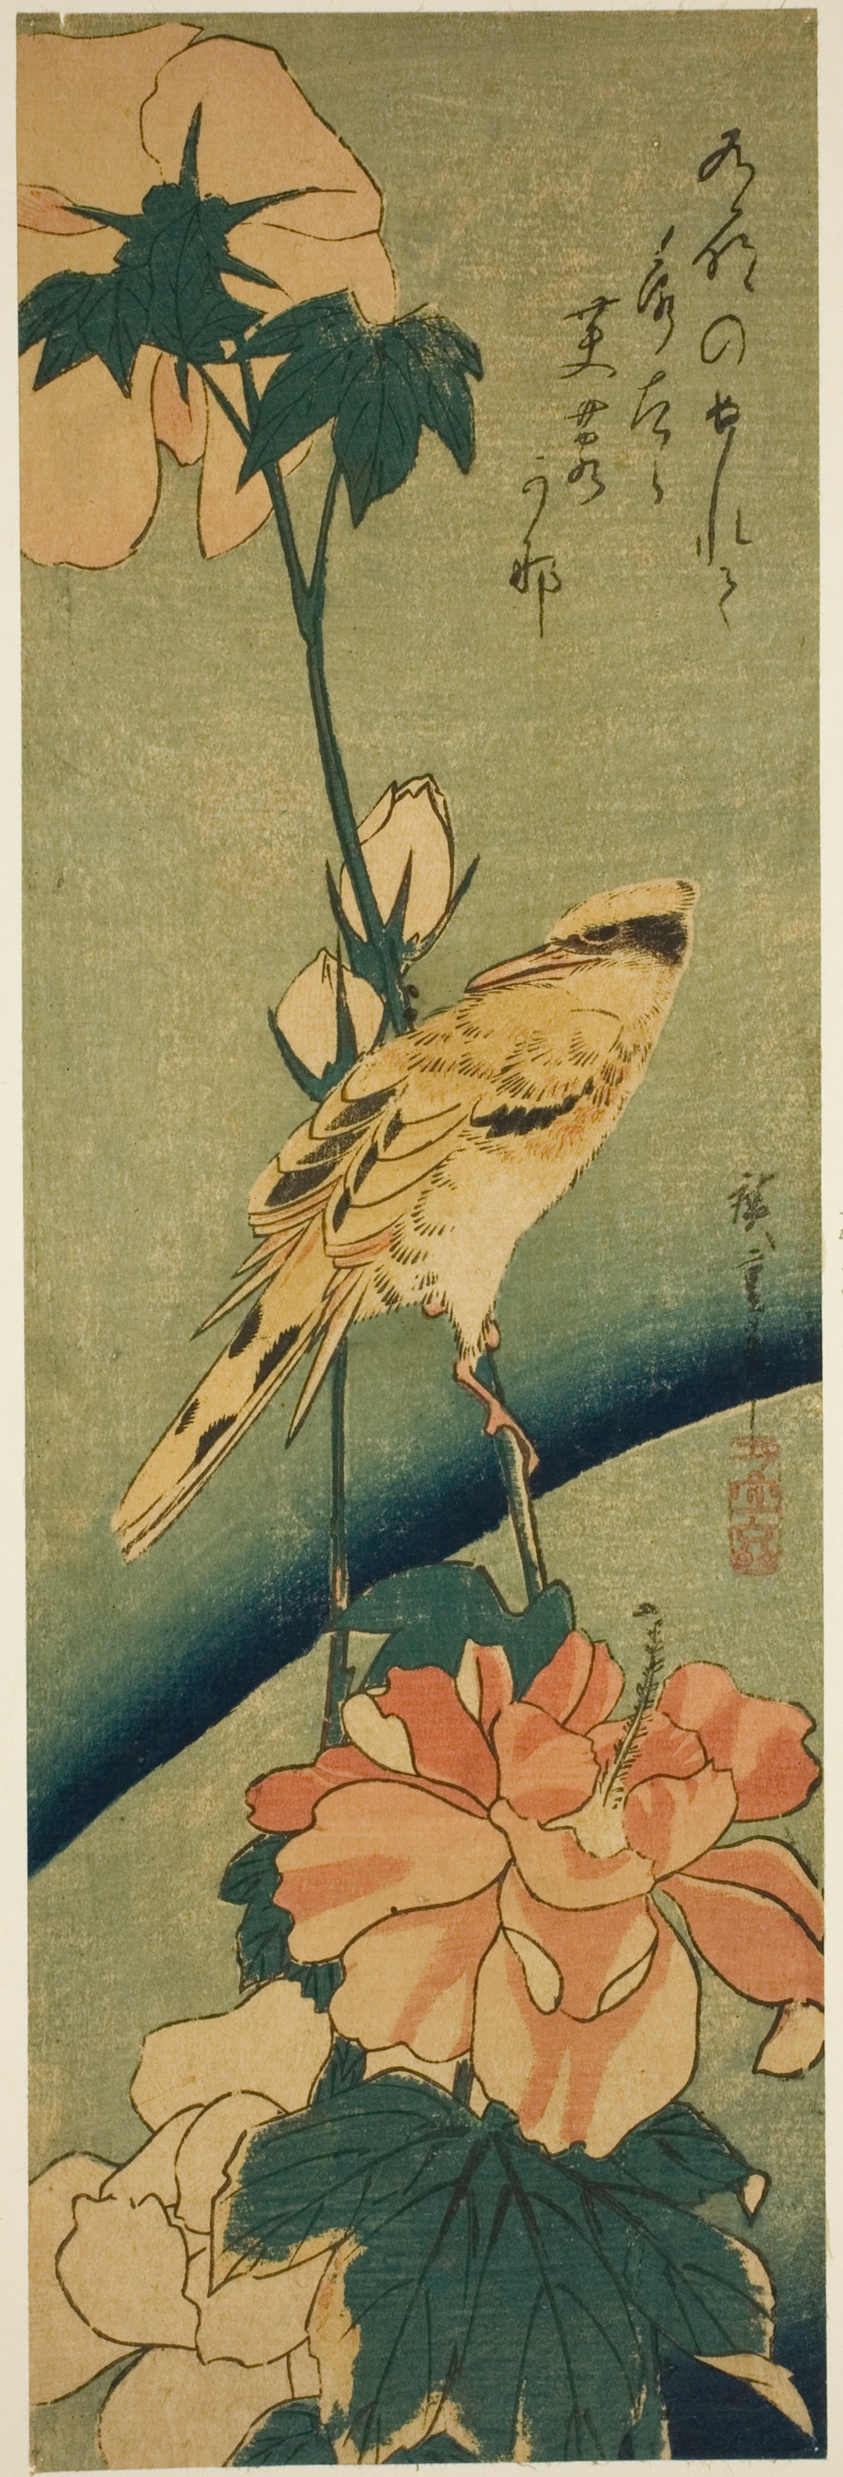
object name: Print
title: Blacked-naped oriole on hibiscus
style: Japanese (culture or style)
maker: Utagawa Hiroshige 歌川 広重; Japanese, 1797-1858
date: mid–1830s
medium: Color woodblock print; chutanzaku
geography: Japan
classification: woodblock print; print; asian art